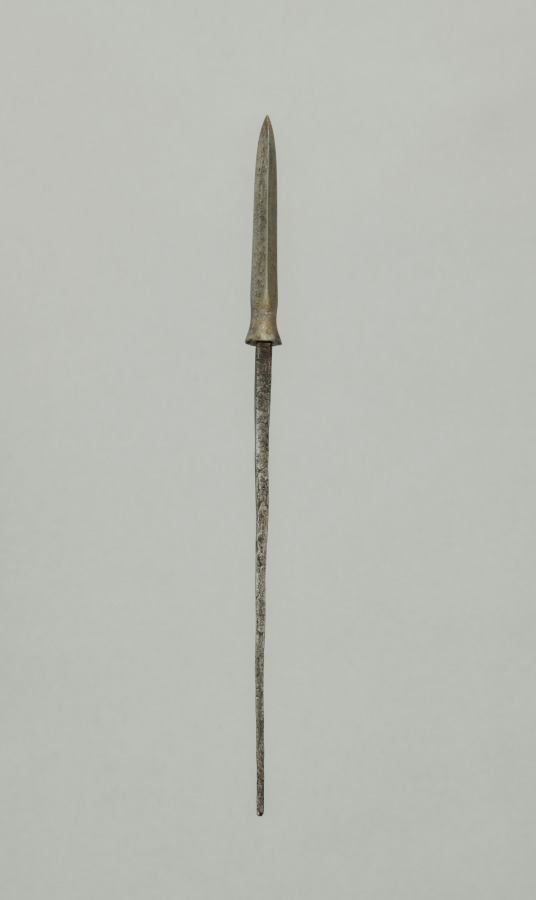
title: Arrow Point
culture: Japan, Edo period (1615–1868)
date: 1700s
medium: steel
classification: Arms and Armor